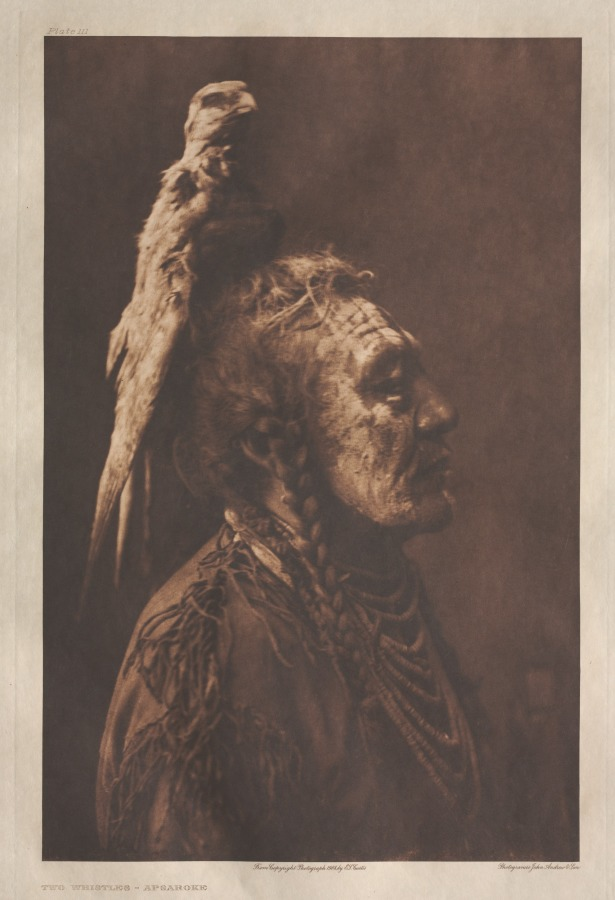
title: Portfolio IV, Plates 111-118, 120-149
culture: America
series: The North American Indian: being a series of volumes picturing and describing the Indians of the United States, The Dominion of Canada, and Alaska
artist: Edward S. Curtis (American, 1868–1952)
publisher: The University Press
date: 1905–8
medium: photogravure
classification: Portfolio